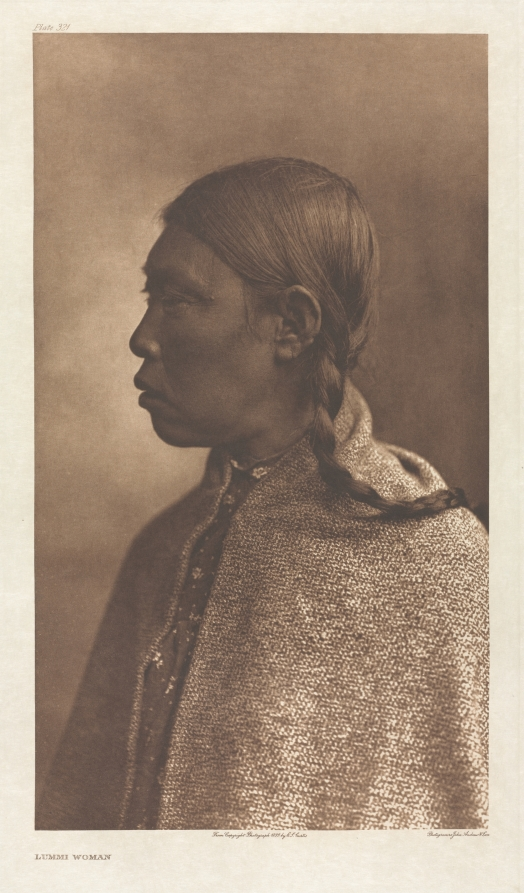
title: Portfolio IX, Plate 321: Lummi Woman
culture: America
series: The North American Indian: being a series of Portfolios picturing and describing the Indians of the United States, the Dominion of Canada, and Alaska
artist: Edward S. Curtis (American, 1868–1952)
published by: The University Press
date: 1899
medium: photogravure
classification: Portfolio